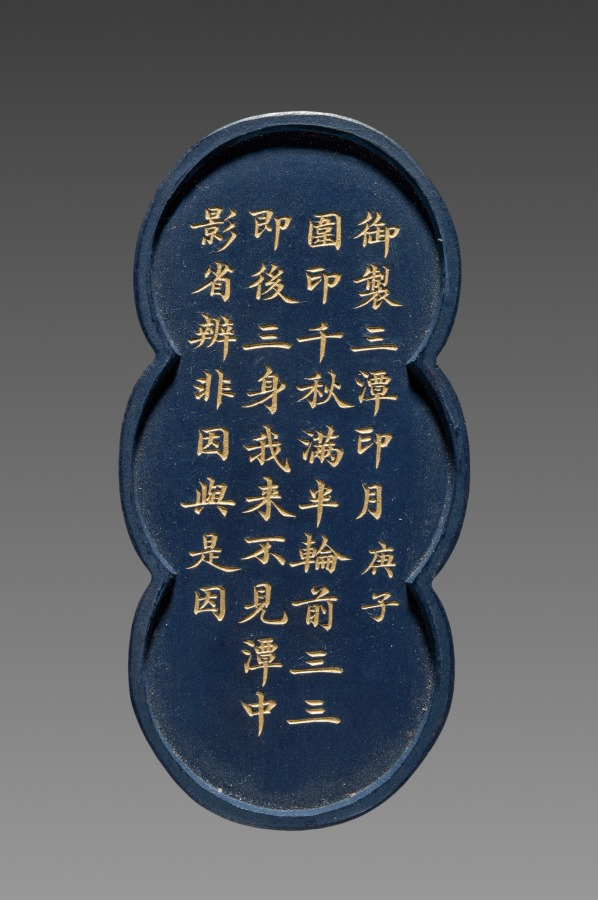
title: Ink Stick from an Imperially Commissioned Set of Ink Stick with Images and Poems of Famous West Lake Sites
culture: China, Qing dynasty (1644–1911), Qianlong reign (1736–95)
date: 1780–94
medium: Molded ink in blue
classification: Miscellaneous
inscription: 乾隆年製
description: This is one of ten ink cakes of different shapes and colors stored in an exquisite lacquer box. Each is inscribed in gold with a poem by the Qianlong emperor, praising the ten famous sights of the Westlake in Hangzhou, near Shanghai. The Westlake is famous for its natural beauty; it was a favorite imperial destination and remains a tourist attraction today. Ink cakes (also called ink sticks) are dissolved with the addition of water and ground on the surface of a flat stone into liquid ink for painting and calligraphy. The precious ink cakes here, however, have never been used.